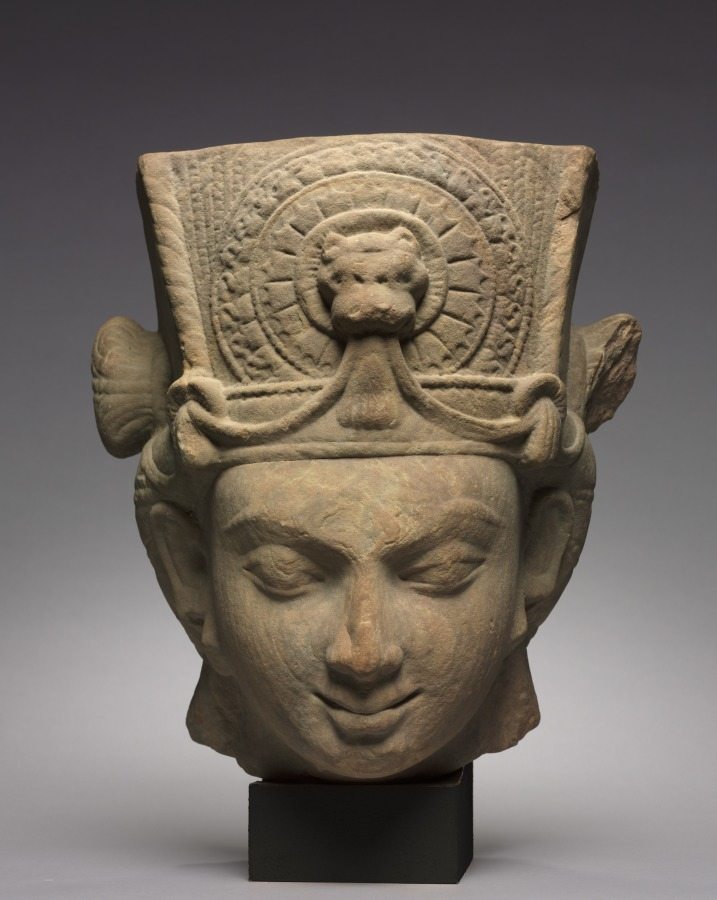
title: Head of Vishnu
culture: Central India, Madhya Pradesh, Vidisha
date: 300s CE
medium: sandstone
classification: Sculpture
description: When complete, this iconic image of the Hindu god Vishnu would have been impressive in scale, approximately life-size. During the Gupta period (c. 319–550 CE), images of Vishnu included a lion head in the center of the crown. The lion communicated royal authority, solar radiance, and the concept of glory. These attributes characterize the power and personality of this deity who ensures the preservation of his creation.